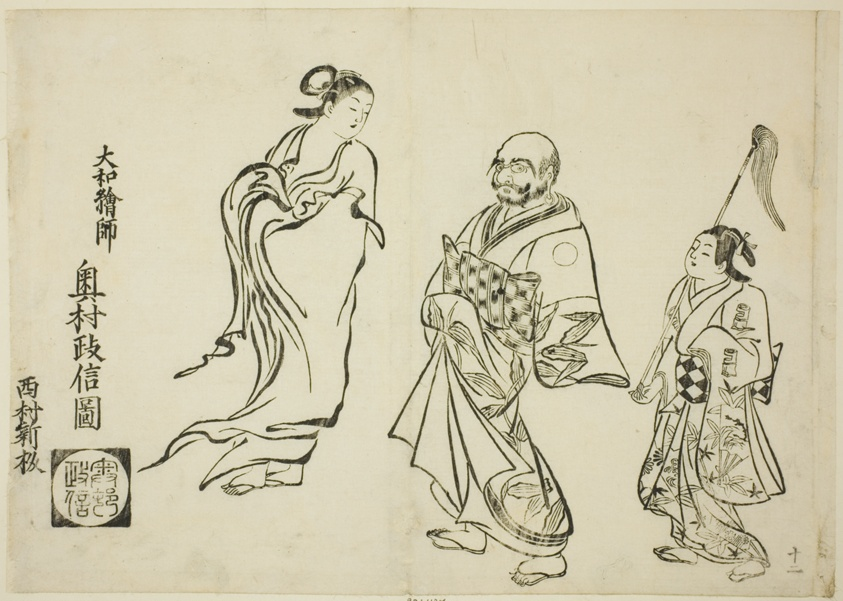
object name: Print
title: The Roles Reversed, no. 12 from a series of 12 prints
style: Japanese (culture or style)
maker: Okumura Masanobu (Japanese, 1686-1764)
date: c. 1708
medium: Woodblock print; oban, sumizuri-e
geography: Japan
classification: woodblock print; print; asian art; woodblock